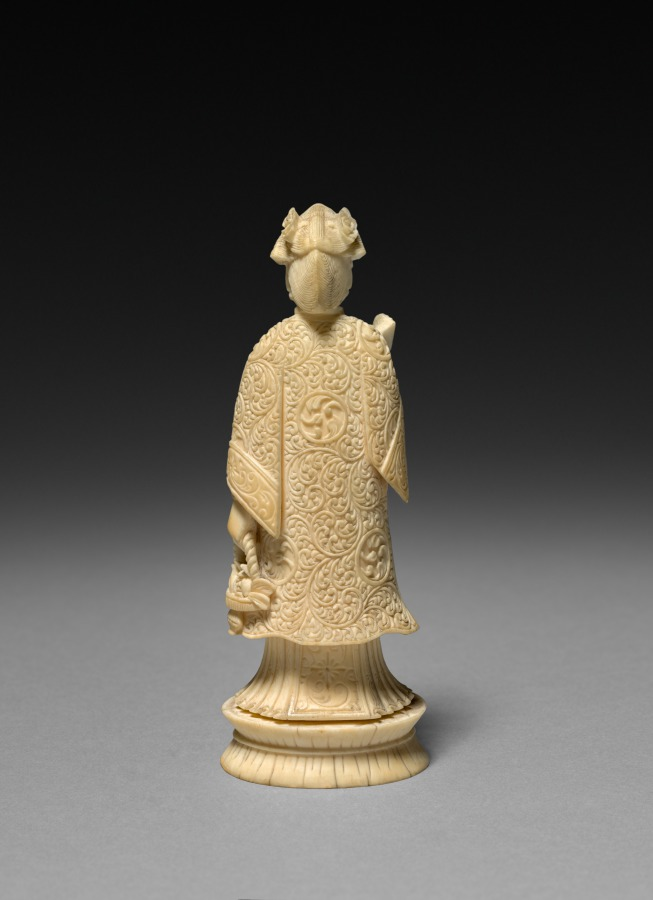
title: Chess Piece: Queen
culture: Japan, Meiji period (1868–1912)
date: early 1900s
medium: ivory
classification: Ivory